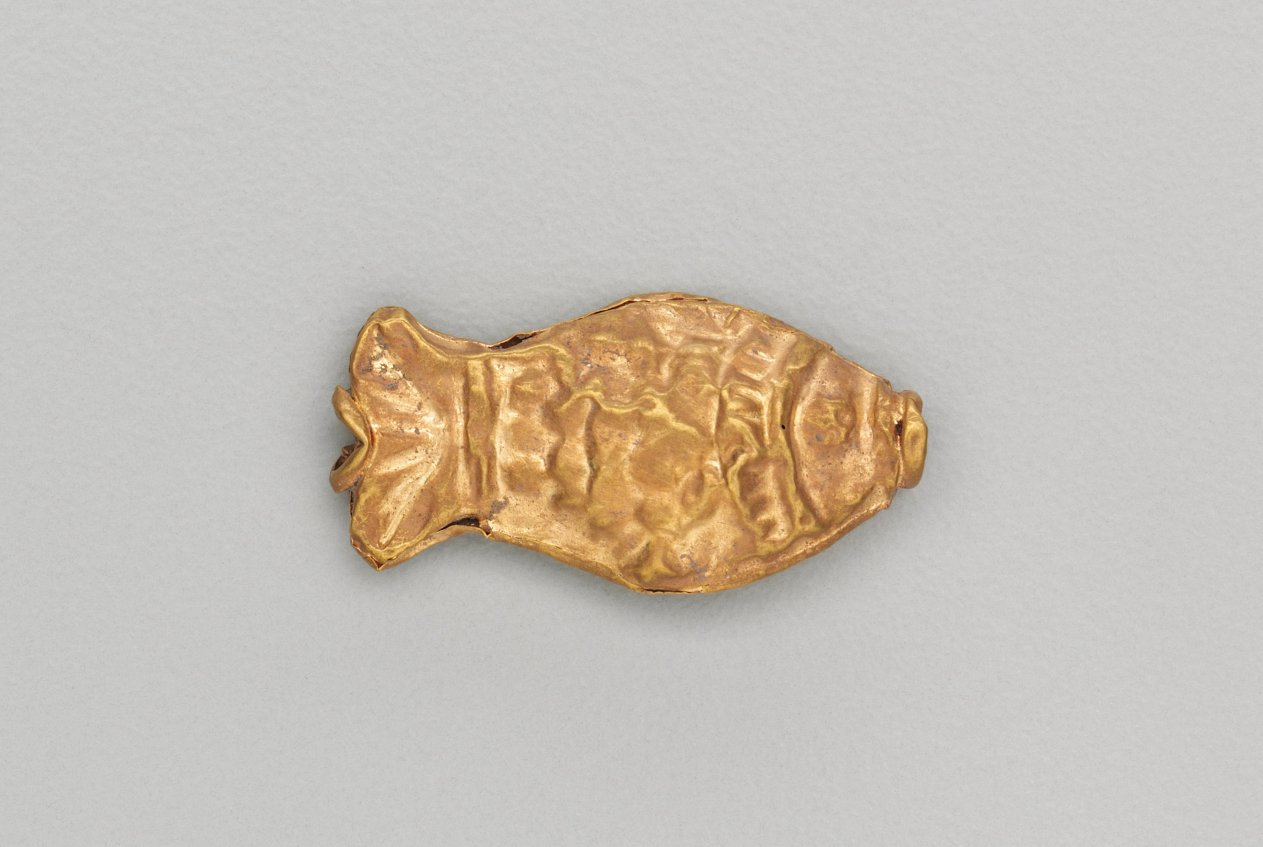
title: Necklace Bead in the Form of a Fish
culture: India, Shunga period (185–78 BCE)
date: 185–72 BCE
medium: gold repoussé with granulation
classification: Jewelry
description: Jewelry in ancient India often consisted of elements associated with water, such as fish and other aquatic plants and animals. Since water is essential for life, imagery that connotes water is life-affirming, or auspicious, and therefore appropriate adornment.